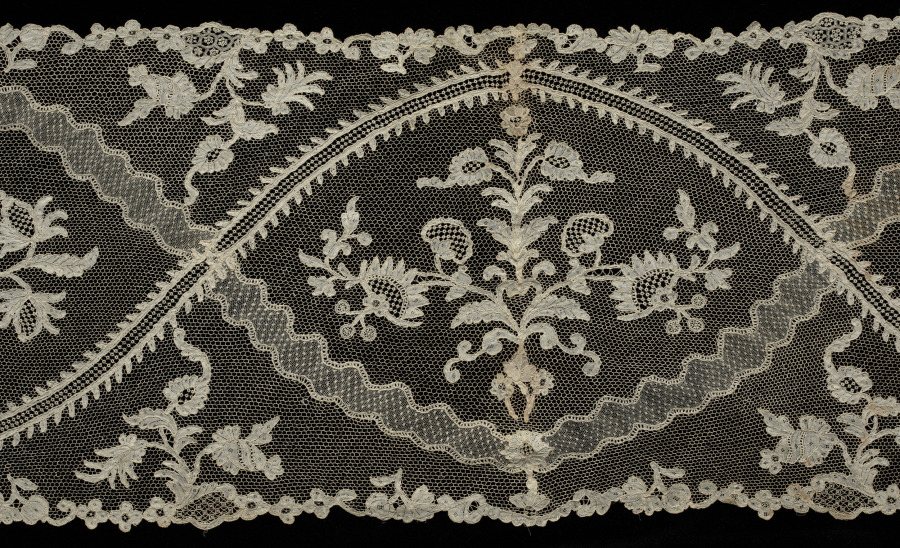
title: Lace Scarf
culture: France, Argentan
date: 1700s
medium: Linen: needle lace (Point de Argentan)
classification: Lace